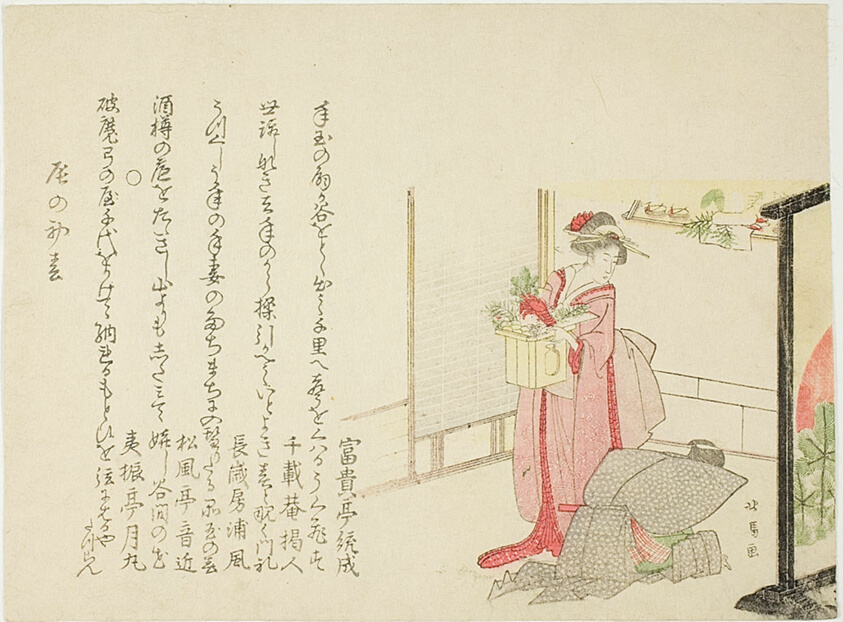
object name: Print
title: Man and Woman at a Household Shrine, for the New Year of Dragon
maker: Teisai Hokuba (Japanese, 1771–1844)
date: 1808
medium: Color woodblock print; surimono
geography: Japan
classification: woodblock print; print; asian art